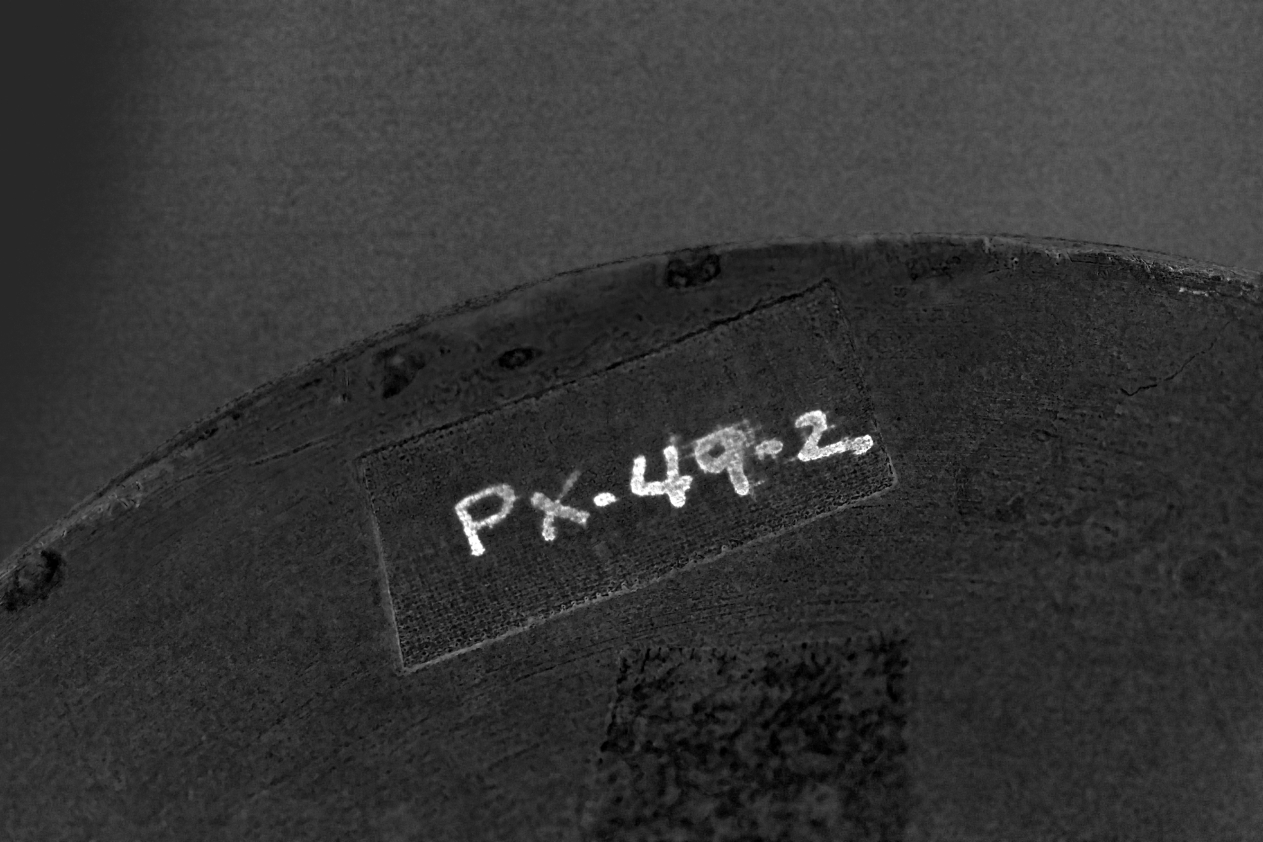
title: Luxury Ewer Extending Good Fortune to the Owner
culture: Iraq, possibly Mosul, Zangid or Artugid Period, 13th Century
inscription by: Ahmad al-Dhaki al-Mawsili (Iraqi, Mosul, active early 1200s?)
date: 1223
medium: brass inlaid with silver; lid and base added later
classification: Metalwork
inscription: Band on the neck (naskh): "Work of Ahmad al-Thaki, the engraver, al-Mawsili, in the year 620 and glory to my owner"; band at the base of the handle (naskh): "Work of Ahmad al-Thaki al-Mawsili"; graffiti of later owners, roughly scratched into the neck of the ewer: "Husayn ibn Qasim"; "Usta al-Muhtasib [?]"; band on the shoulder of the ewer (plaited, animated kufic): "Good luck, and learning, and commanding respect, and prosperity, and pride, and generosity, and faithfulness, and affection, and glory, and survival, and justice, and blessings, and exaltedness, and prosperity, and everlasting peace, and charitable giving."; band on the foot (naskh) [foot is a later addition]; this inscription has not yet been deciphered.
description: This silver inlaid ewer was produced for luxury clientele. The wide band around the body of the vessel displays vignettes of daily and courtly life contained within multilobed medallions. Some of the scenes feature falconry, hunting, dancing, and several groups of musicians. All these scenes are set off against a skillfully executed arabesque background—a pervasive motif in Islamic art characterized by interwoven vegetal and curvilinear elements. An inscription around the ewer’s shoulder extends good fortune, prosperity, and peace to the owner. The ewer is dated 1223 and signed by the master craftsman Ahmad al-Dhaki of Mosul.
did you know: Later owners roughly scratched their names into the neck of the ewer.